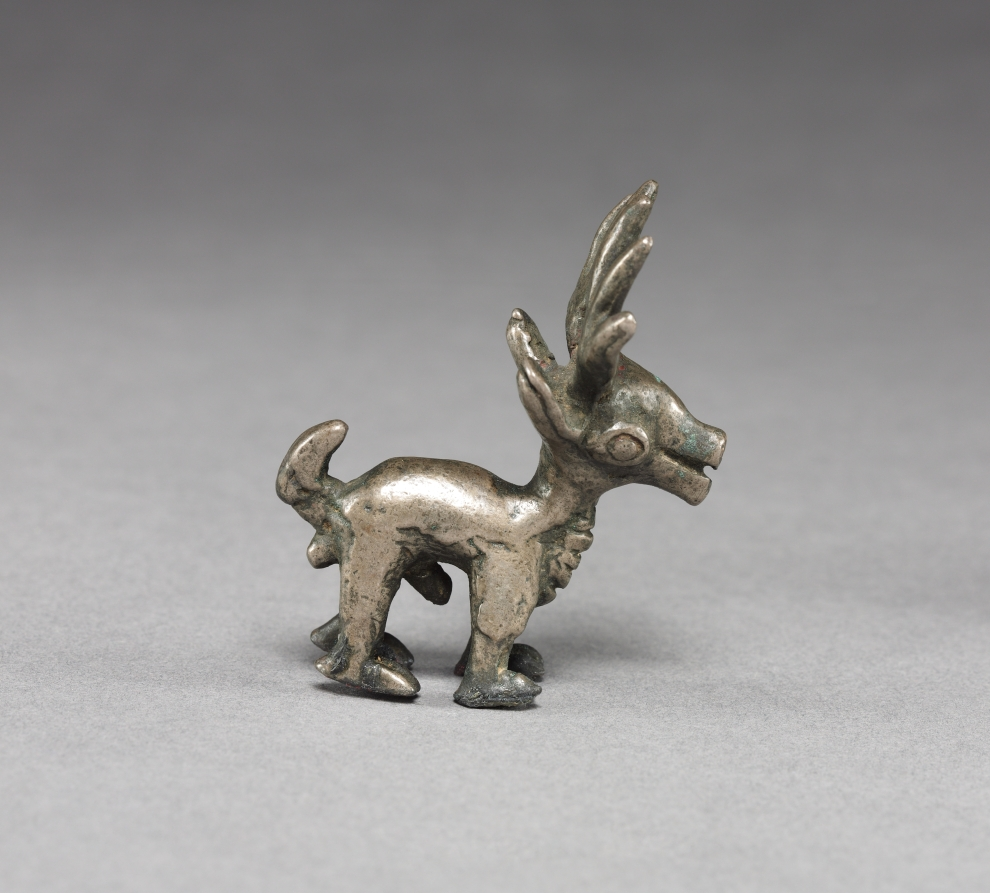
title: Deer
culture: Peru, Ica Valley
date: 1000–1532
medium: silver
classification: Metalwork